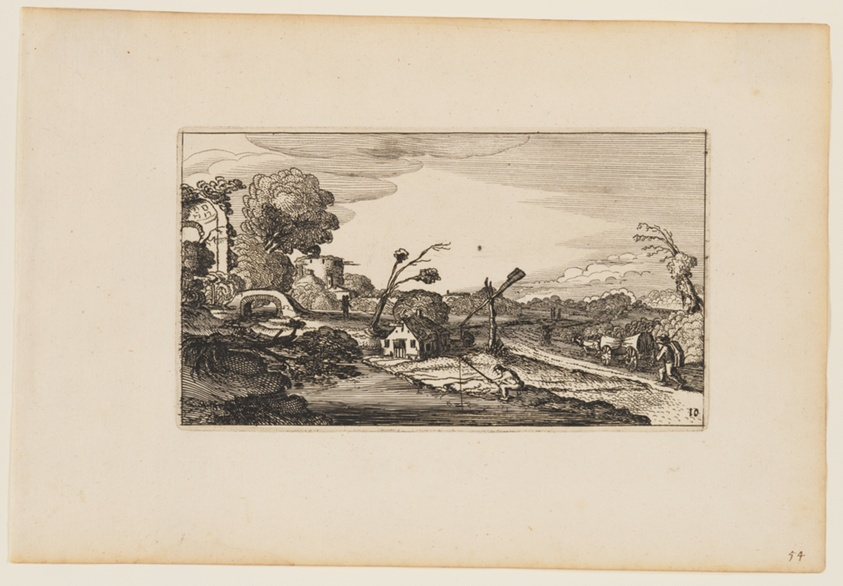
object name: Print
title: Path to Right of Water; Roman Ruins Beyond at Left, from Twelve landscapes with Figures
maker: After Gillis van Scheyndel; Dutch, 1595–1660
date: 1624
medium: Etching on ivory laid paper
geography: Netherlands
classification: etching; paper; print; prints and drawing